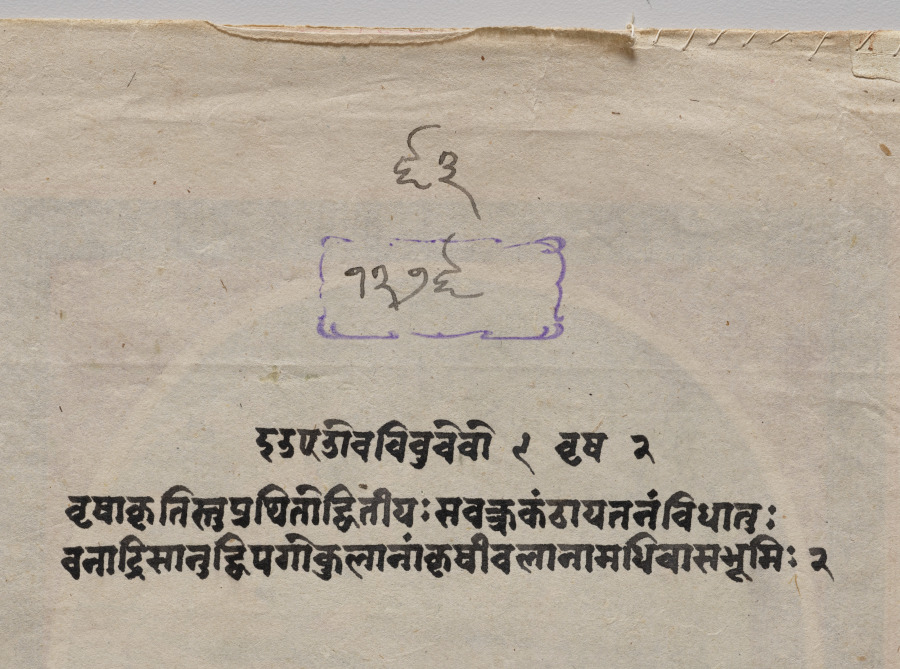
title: Taurus, from a "Mandi Astrology Series"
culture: Northern India, Pahari kingdoms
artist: attributed to Sanju (Indian, active late 1700s–early 1800s)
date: c. 1810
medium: Gum tempera and gold on paper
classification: Painting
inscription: The attached flysheet has a number, verse, and the stamp of the Mandi Royal Library, filled with the number 1296. The series number is 63, with the verse is number 2.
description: Standing for the astrological sign Taurus, the large-scale bull fills the space like a graceful icon behind a much smaller herd of cows. Pure white in color and in perfect profile, he has been adorned with a string of bells, a jeweled diadem, and decorative tips on his horns. A fine textile with gold leafy arabesque patterns sets him apart from oxen, dairy cows, and even the elephants in the distant background.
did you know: The oval format derives from the popularity of British cameos at the Mughal court.